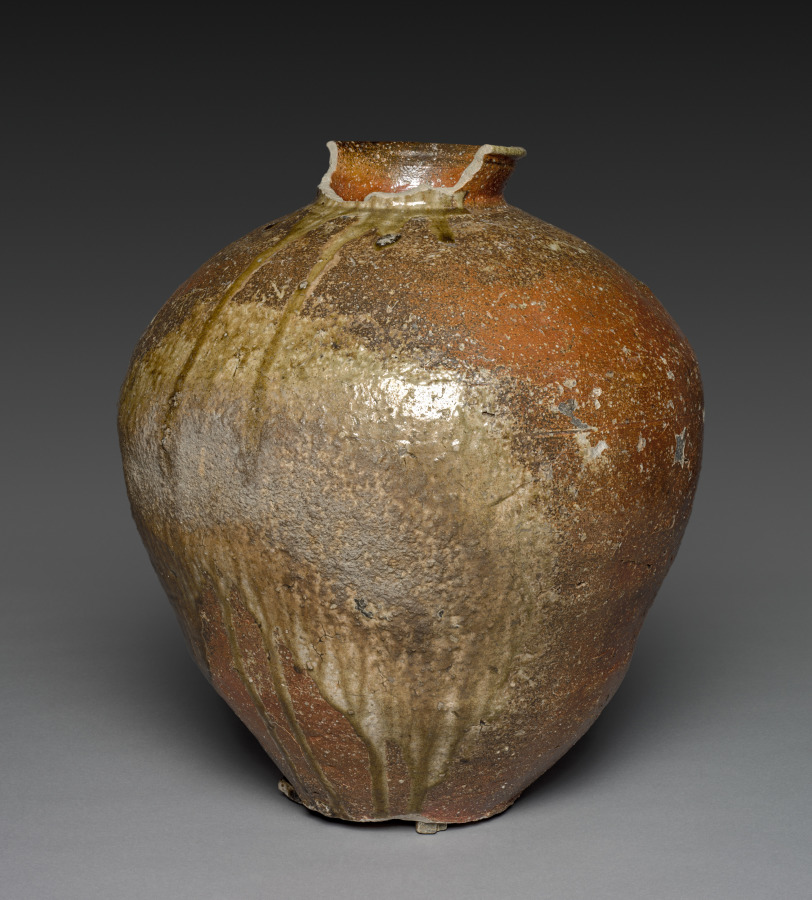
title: Storage Jar (Tsubo)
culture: Japan, Muromachi period (1392–1573)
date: 1400s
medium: Stoneware with natural ash glaze (Shigaraki ware)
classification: Ceramic